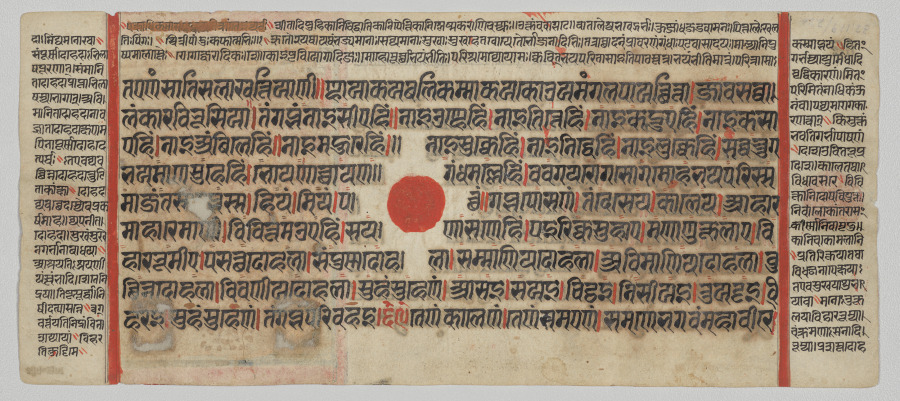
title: Text, Folio 30 (recto), from a Kalpa-sutra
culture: Western India, Gujarat, last quarter of the 15th century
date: c. 1475–1500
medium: Gum tempera, ink, and gold on paper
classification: Painting